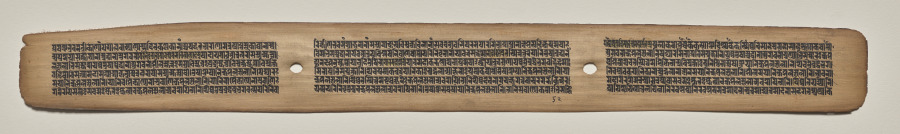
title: Text, folio 50 (recto), from a Manuscript of the Perfection of Wisdom in Eight Thousand Lines (Ashtasahasrika Prajnaparamita-sutra)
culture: Eastern India, Bihar, Vikramashila Monastery. Painting: Nepal, Kathmandu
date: Sunday, September 14, 1119 (year 239 of the Newar Samvat in the month of Ashvina)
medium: gum tempera and ink on palm leaves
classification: Painting